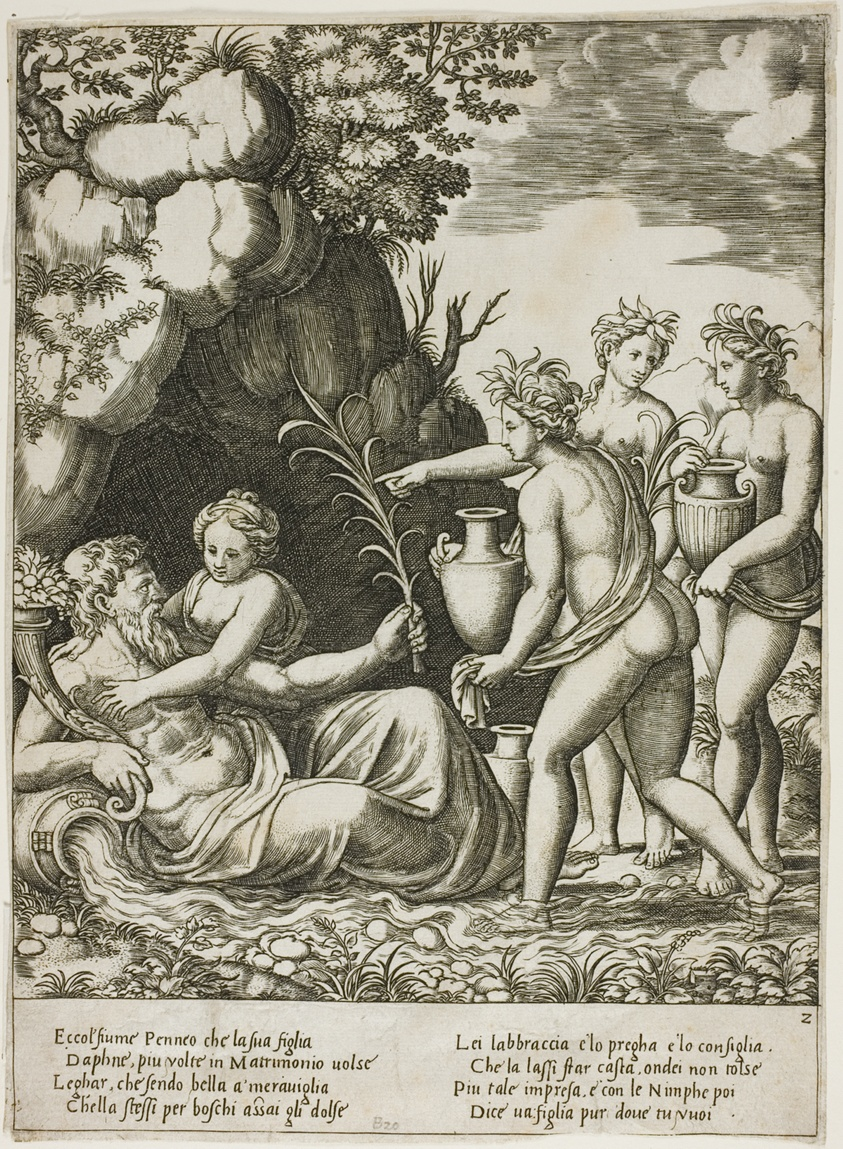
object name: Print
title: Daphne Embracing her Father, the River Peneus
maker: Master of the Die (Italian, active c. 1530-1560); after Giulio Romano (Italian, 1492/99-1546)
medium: Engraving in black on paper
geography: Italy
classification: print; prints and drawing